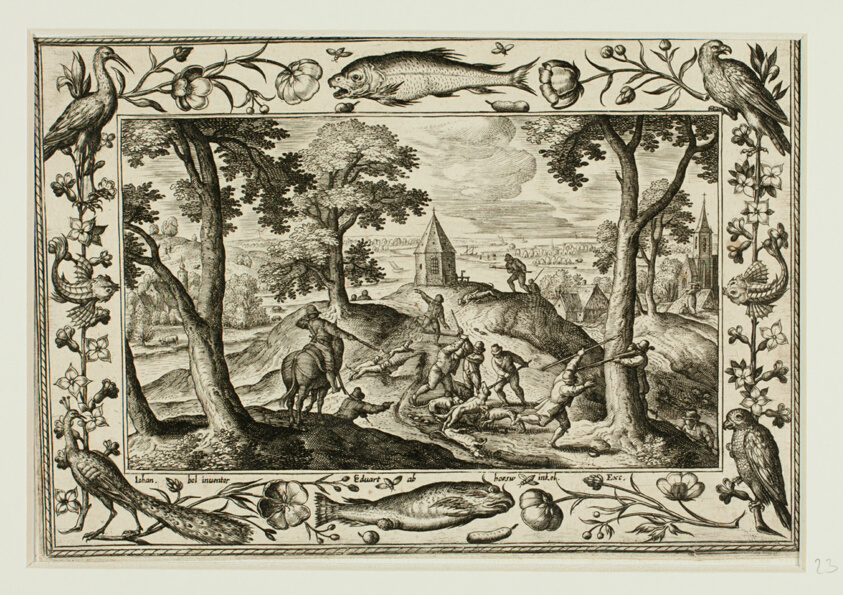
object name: Print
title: Wolf Hunt, from Landscapes with Old and New Testament Scenes and Hunting Scenes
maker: Adriaen Collaert (Flemish, c. 1560–1618); after Hans Bol (Flemish, 1535–1593); published by Anna van Hoeswinckel (Flemish)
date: 1584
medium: Engraving in black on cream laid paper, laid down on cream laid paper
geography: Flanders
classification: engraving; paper; print; prints and drawing